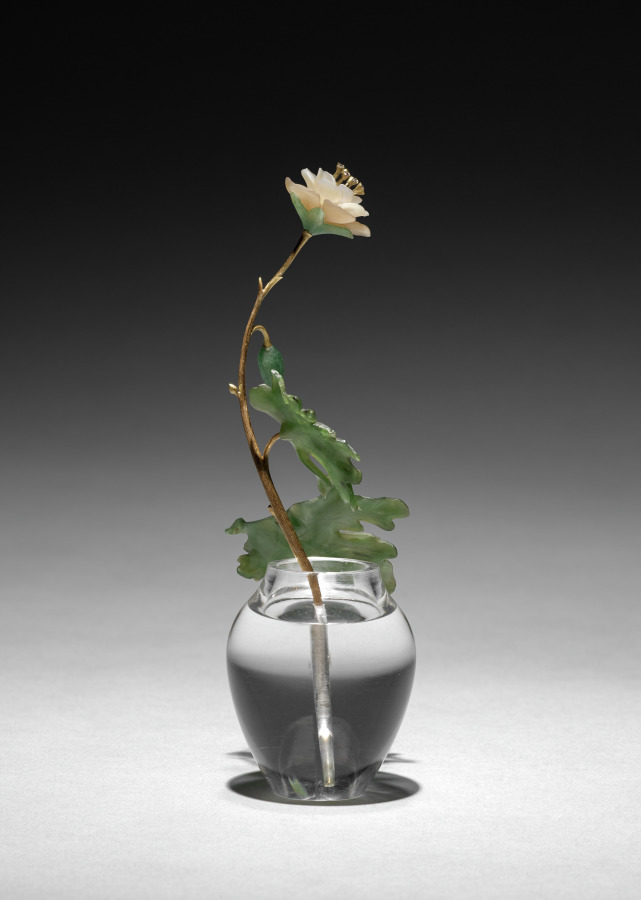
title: Flower Study of an Anemone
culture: Russia, St. Petersburg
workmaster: Henrik Wigström (Russian, 1862–1923)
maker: House of Fabergé (Russian, 1842–1918)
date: c. 1905–15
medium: mat white stone, gold, sapphires, jade, rock crystal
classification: Miscellaneous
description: This flower study depicts a wild anemone in bloom. Fabergé’s inspiration for his flower studies is said to have come from the floral brooches of precious stones that were made in the 1700s for Catherine the Great as well as from the Japanese art of flower arranging, known as ikebana. Small and delicate, Fabergé’s flower studies were given as intimate gifts to friends by the tsarina and others in the court. She also liked to take them around to wherever the imperial family was residing as a reminder of spring during the harsh Russian winters.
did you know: The stems of Fabergé’s flower studies are set into little basins carved from rock crystal to resemble pots of water.